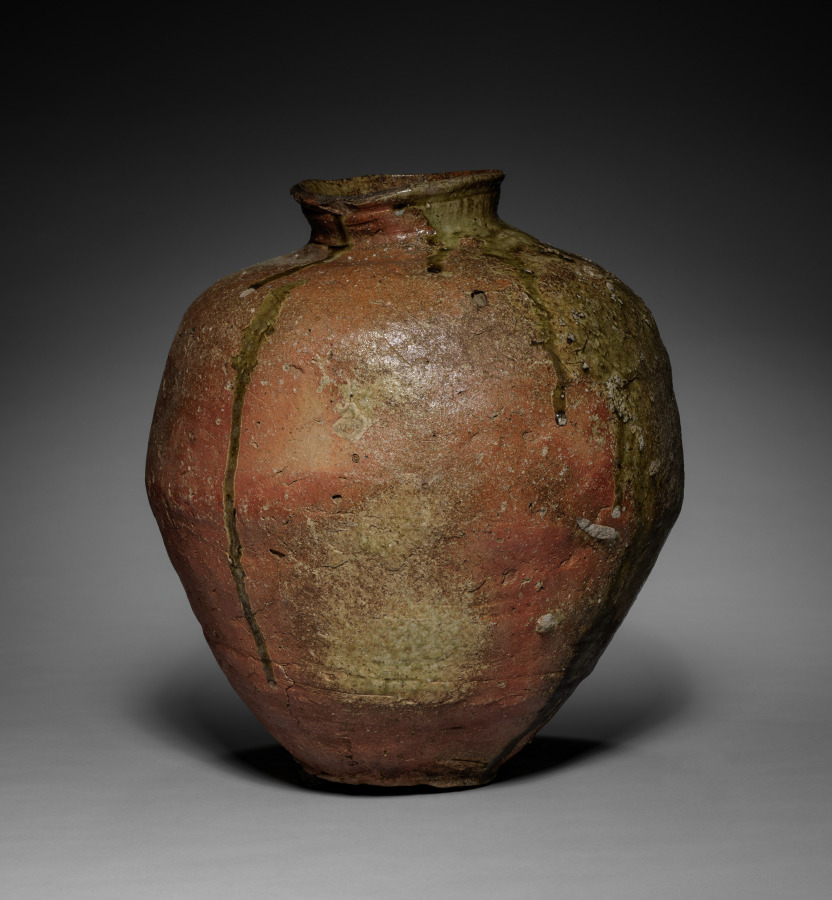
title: Large Jar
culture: Japan, Muromachi period (1392–1573)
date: 1400s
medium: stoneware with natural ash glaze (Shigaraki ware)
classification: Ceramic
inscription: Box inscription (front): 「不明」壺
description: The orange color of this jar comes from iron in the clay. Natural ash glaze settled on the vessel during firing. Originally intended for grain storage, rustic containers like this one were also prized by tea enthusiasts, who appreciated the uncalculated beauty of the glaze and the asymmetry of these humble objects. They used them to store tea leaves.